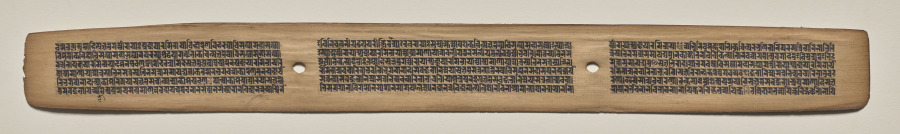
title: Text, Folio 107 (recto), from a Manuscript of the Perfection of Wisdom in Eight Thousand Lines (Ashtasahasrika Prajnaparamita-sutra)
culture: Eastern India, Bihar, Vikramashila Monastery. Painting: Nepal, Kathmandu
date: Sunday, September 14, 1119 (year 239 of the Newar Samvat in the month of Ashvina)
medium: gum tempera and ink on palm leaves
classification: Painting